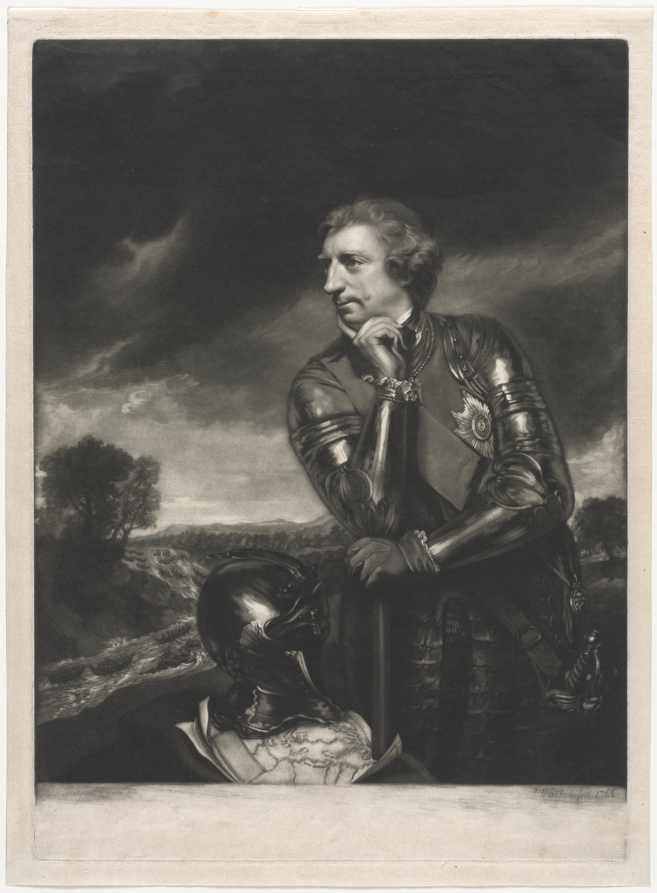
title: Sir Jeffrey Amherst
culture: England, 18th century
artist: James Watson (British, 1740–1790)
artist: after Joshua Reynolds (British, 1723–1792)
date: 1766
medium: mezzotint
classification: Print